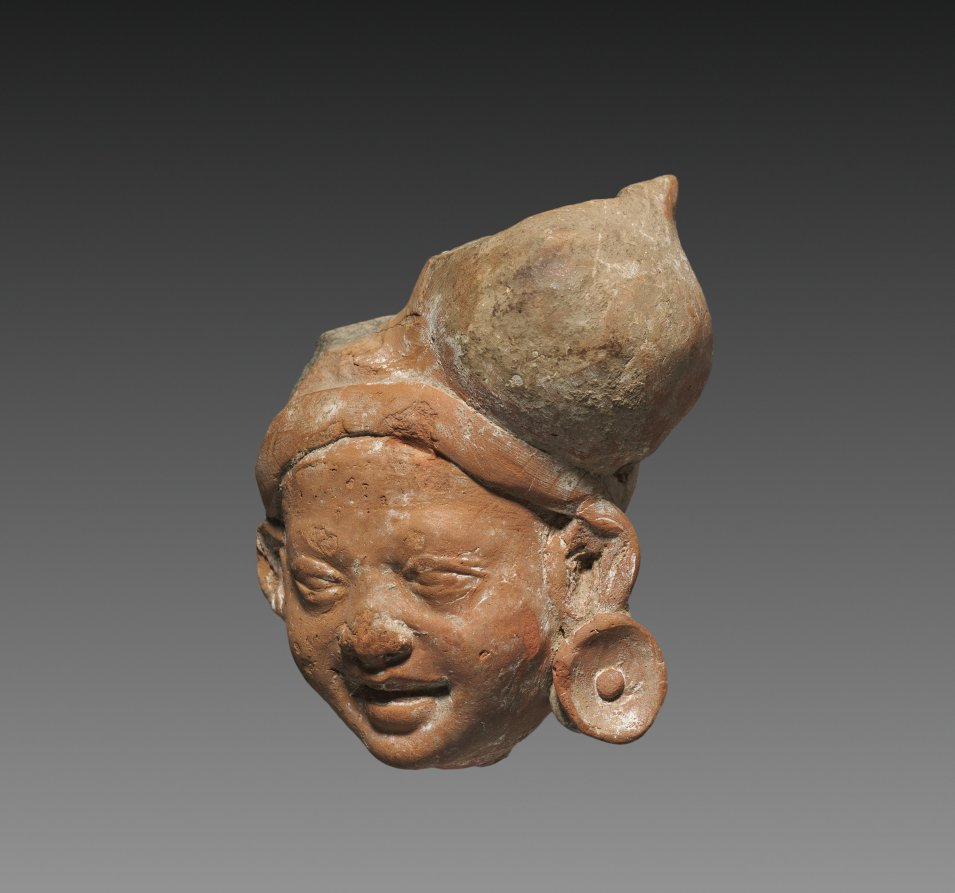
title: Male Head, possibly a Yaksha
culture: Northeastern India, Bihar, Patna, Bulandibagh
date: 300s BCE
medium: terracotta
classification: Sculpture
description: The large turban and earring suggest that this head may have belonged to a yaksha, a nature divinity worshipped for wealth and prosperity. The small scale and terracotta material imply that it may have been installed on a domestic shrine. The naturalism of the fleshy face and parted mouth are stylistic features of sculptures from the Maurya period, and this work was found at the Maurya capital of Pataliputra.